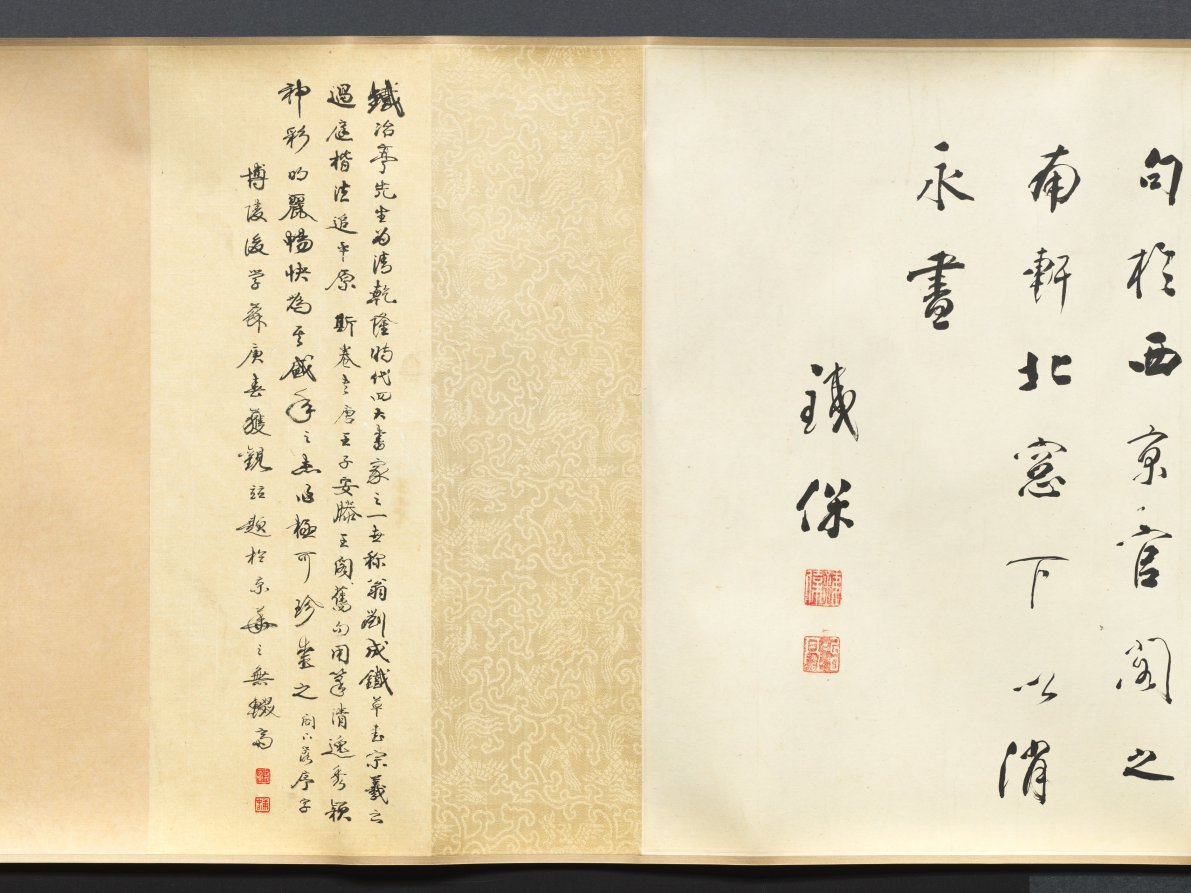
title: Calligraphy in Running Style based on Wang Bo's Essay on Tengwang Pavilion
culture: China, Changbai, Qing dynasty (1644-1911)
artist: Tiebao (Chinese, 1752–1824)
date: 1811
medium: handscroll, ink on paper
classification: Calligraphy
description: A member of the Donggo clan, Tiebao belonged to the Manchu Plain Yellow Banner army. As an official in the Qing court, he endured considerable vicissitude and his career was never smooth. Celebrated as a man of letters, he oversaw the publications of the Manchu military system as well as an anthology of poems by members of the imperial family and other Manchu dignitaries. In calligraphy, he was regarded as the equal of such eighteenth-century luminaries as Liu Yong (1720-1805) and Weng Fanggang (1733-1818). This handscroll is a work of his mature years and is exemplary of his disciplined and highly subtle approach to the art of calligraphy.